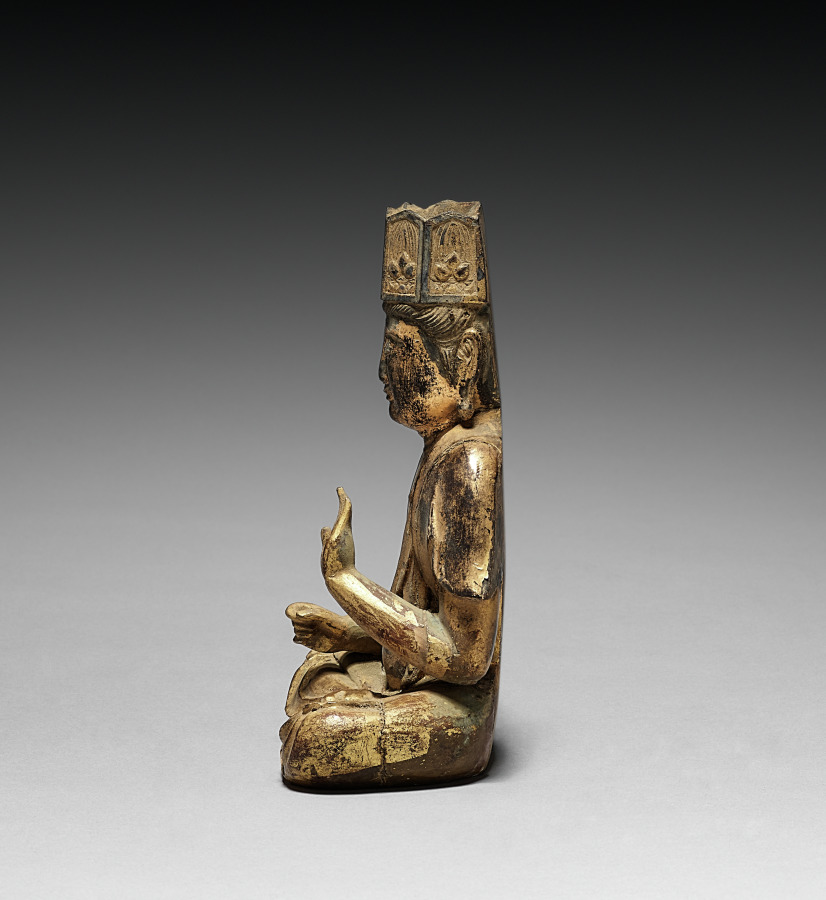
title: Bodhisattva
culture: Japan, Heian period (794–1185)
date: 900s-1100s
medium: gilded wood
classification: Sculpture